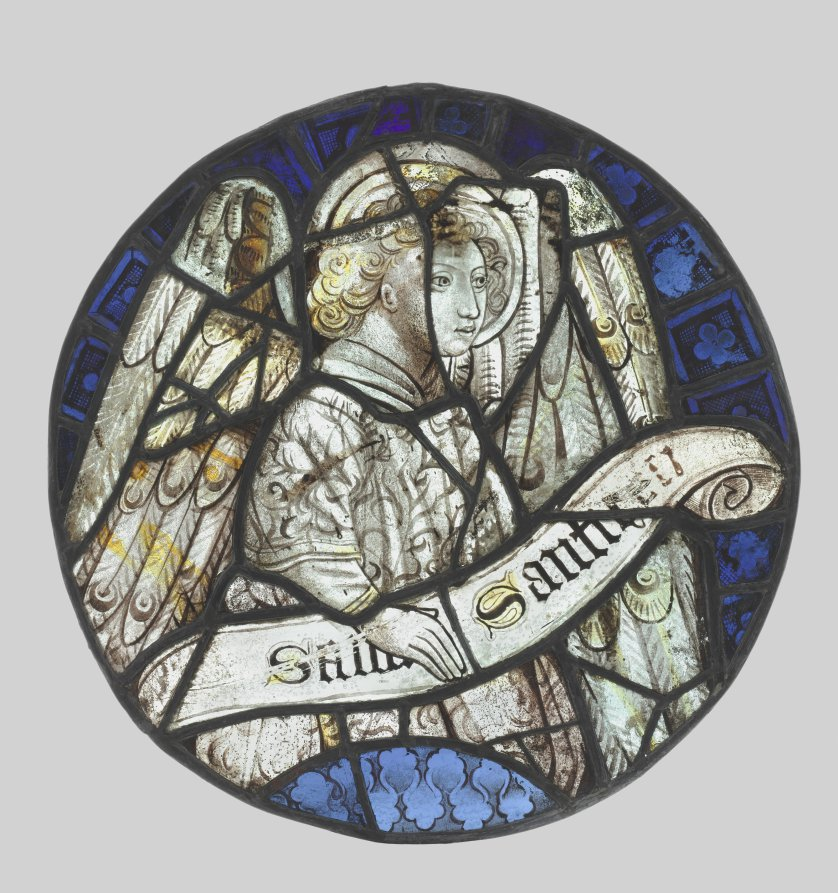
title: Stained Glass Roundel with an Angel Holding a Scroll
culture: France, 15th century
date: c. 1425–1450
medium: Stained glass (pot-metal and painted grisaille)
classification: Glass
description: The term pot-metal refers to glass that received its color in the melting pot when various metallic oxides were added. It was then possible to paint the surface of the glass in order to outline, decorate, and define details such as eyes and hair--as may be observed on this stained glass panel.